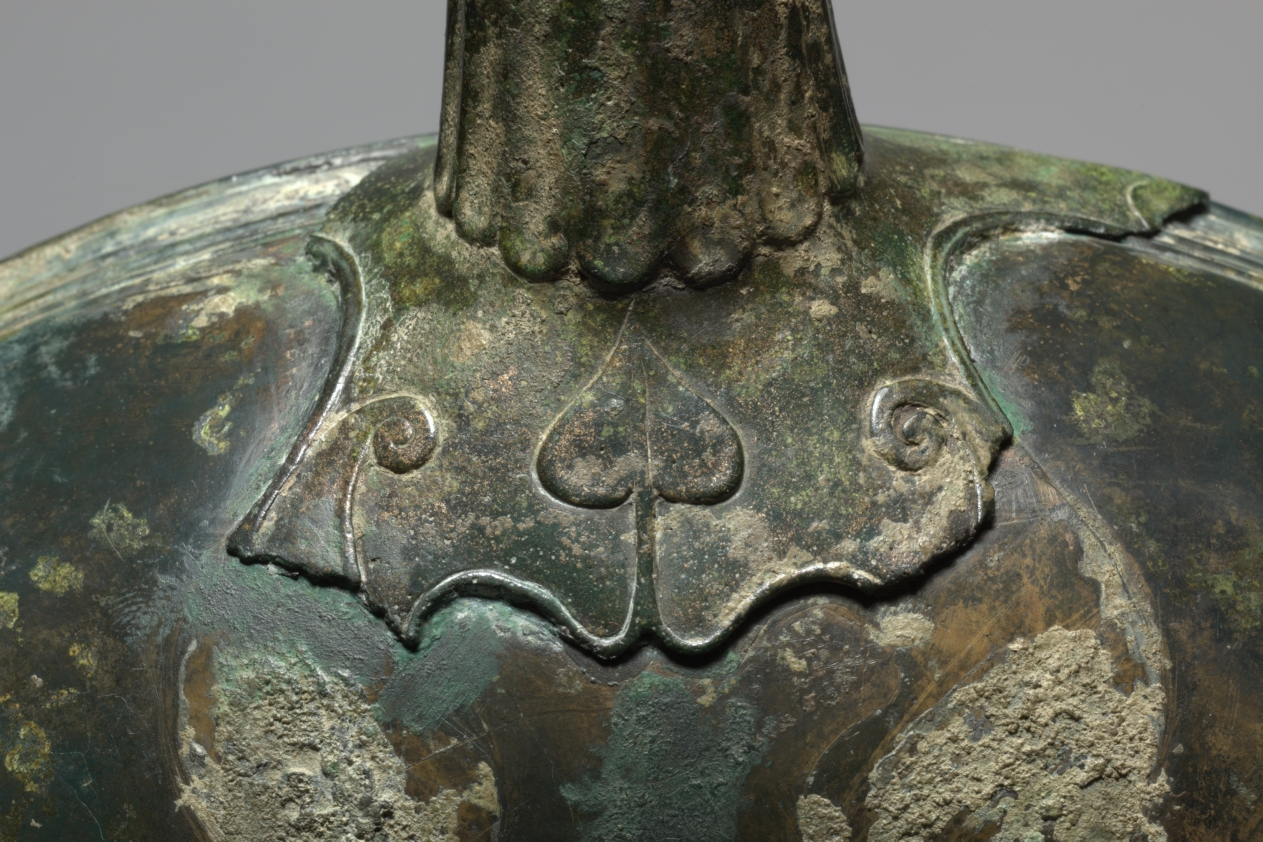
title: Patera with Fluted Handle and Ram Head Finial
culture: Greece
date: 500–400 BCE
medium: bronze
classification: Metalwork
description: This patera is made from a shallow bronze dish attached to a fluted handle, terminating in a ram’s head. The ram’s head is realistically rendered through careful modeling and a high level of detail. Though the patera looks much like a modern frying pan, in antiquity it would have been used for pouring wine during important rituals.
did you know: Ivy leaves, like the tiny example found under the patera's handle, were associated with wine and revelry.